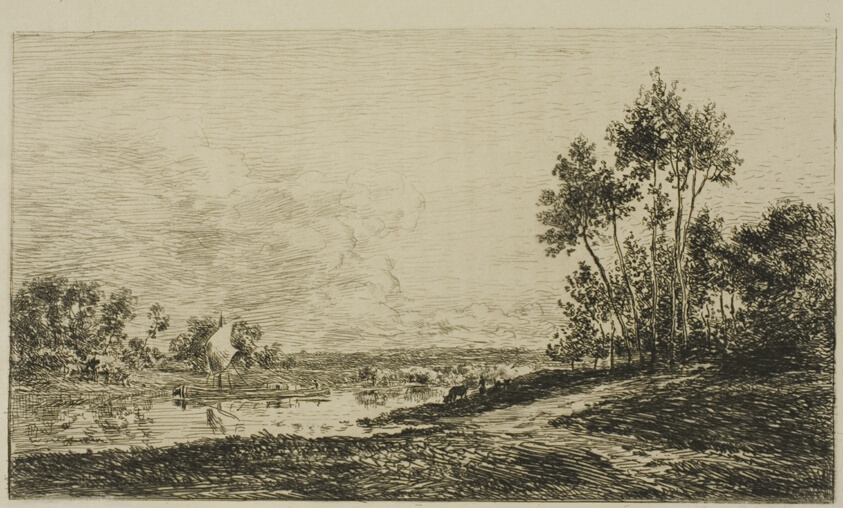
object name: Print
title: The Seine at Port-Maurin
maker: Charles François Daubigny (French, 1817-1878)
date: 1876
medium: Etching and drypoint on cream laid paper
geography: France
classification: etching; print; prints and drawing